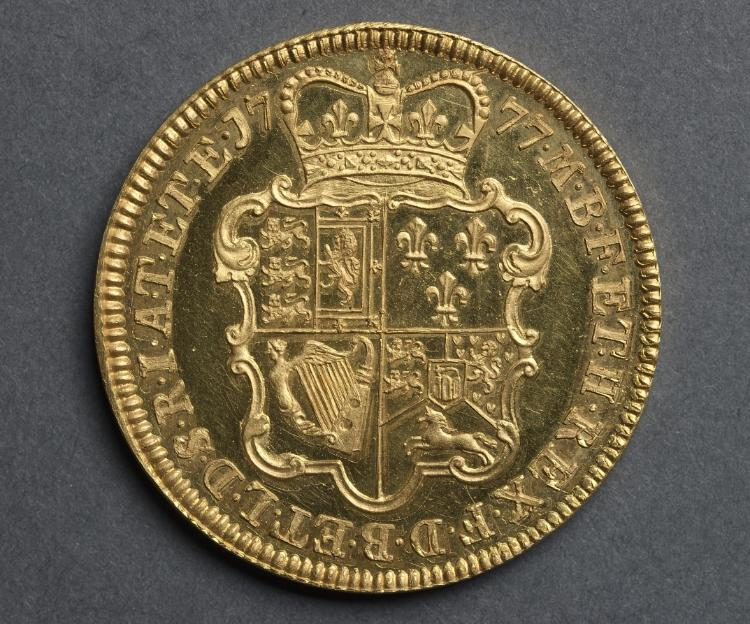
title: Five Guineas: Ornate Crowned Shield of Arms (reverse)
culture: England, George III, 1760-1820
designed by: Richard Yeo (British, 1720–1779)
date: 1777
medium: gold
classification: Coins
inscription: M.B.F.ET.H.REX.F.D.B.ET.L.D.S.R.I.A.T.ET.E.1777.